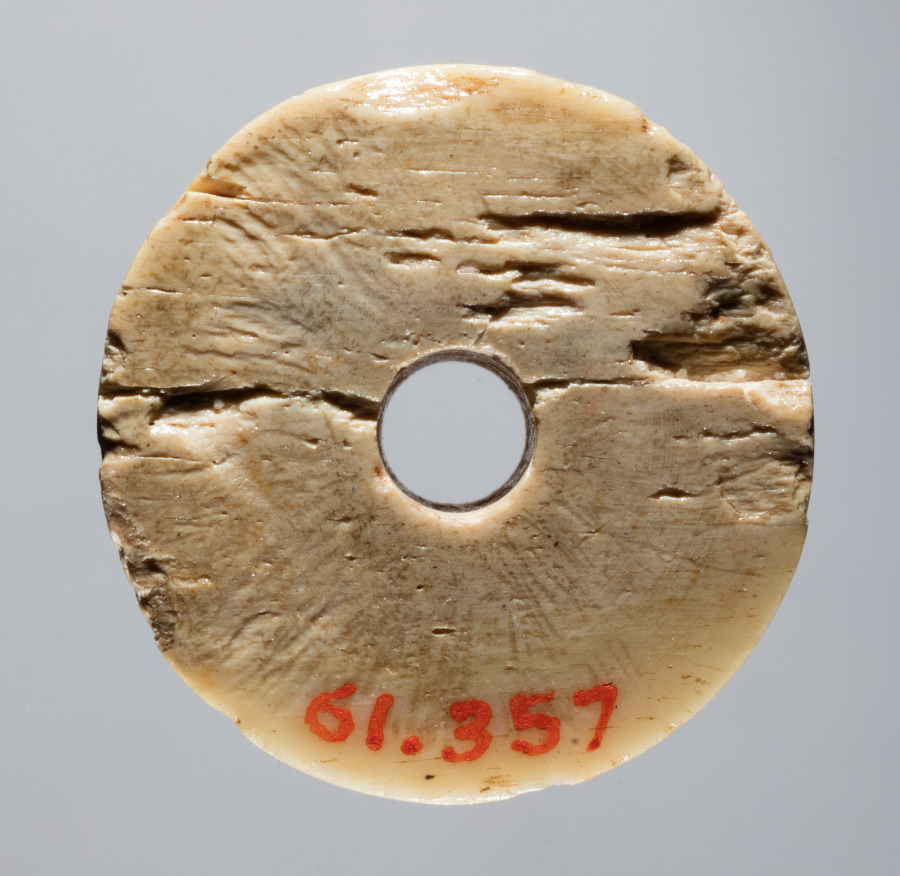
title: Spindle Whorl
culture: Iran, early Islamic period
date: 8th-10th century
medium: bone, incised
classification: Spindle Whorl